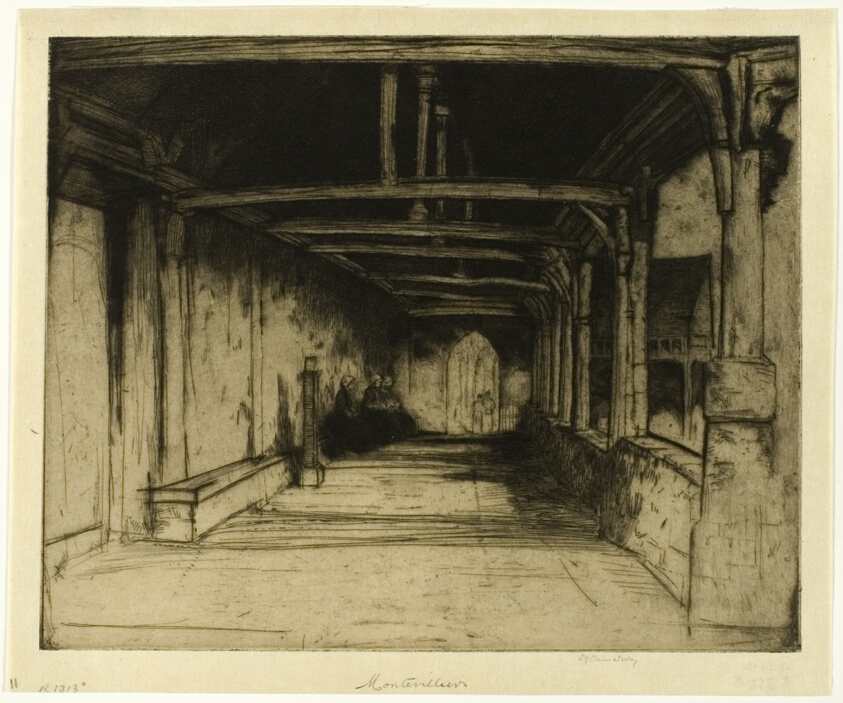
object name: Print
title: Montivilliers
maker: David Young Cameron (Scottish, 1865-1945)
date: 1903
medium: Etching, with touches of drypoint, on cream Japanese paper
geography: Scotland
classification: etching; print; prints and drawing